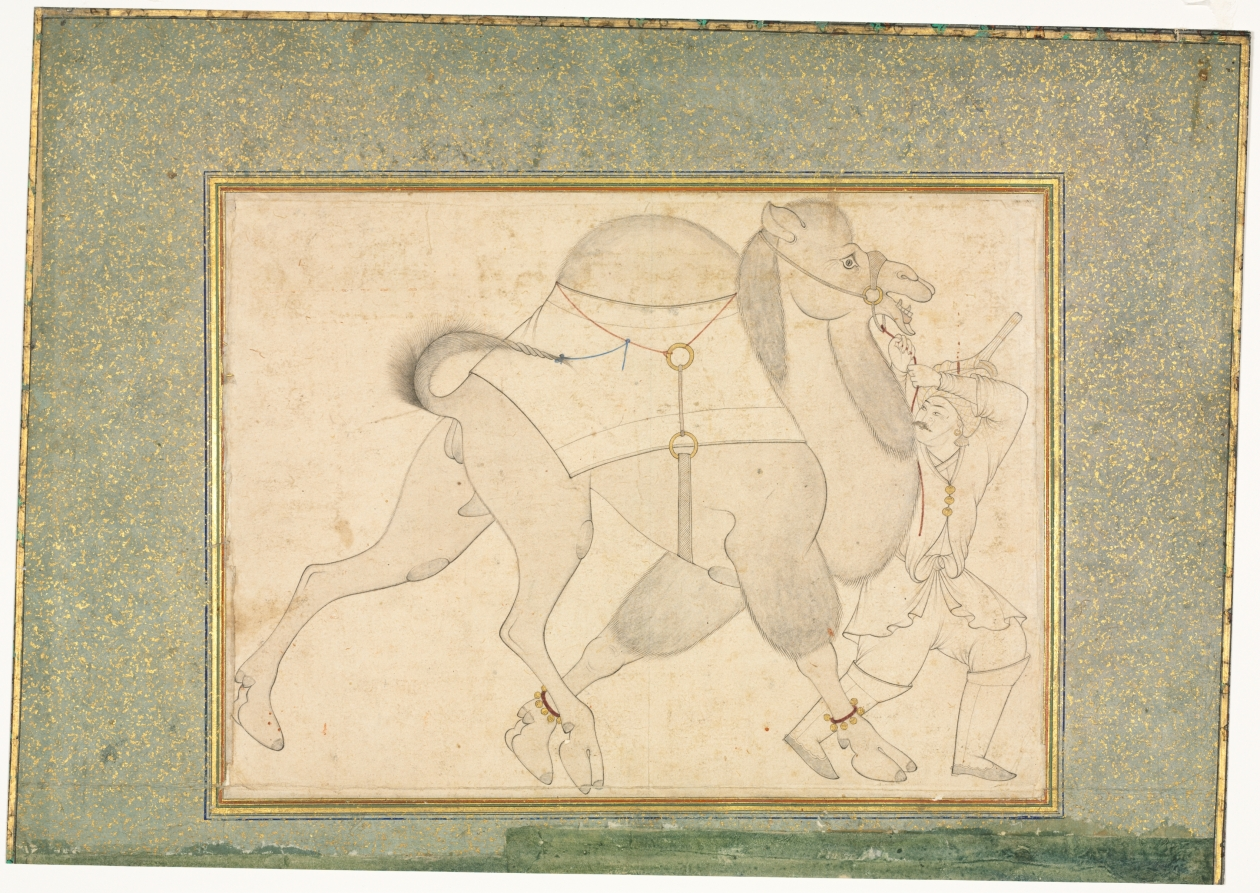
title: Camel and Groom; Single Page Illustration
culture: Iran, Qazvin, Safavid Period, 16th Century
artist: style of Shaykh Muhammad (Iranian)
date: c. 1545–1576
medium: ink, gold, and opaque watercolor on paper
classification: Drawing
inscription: script: none